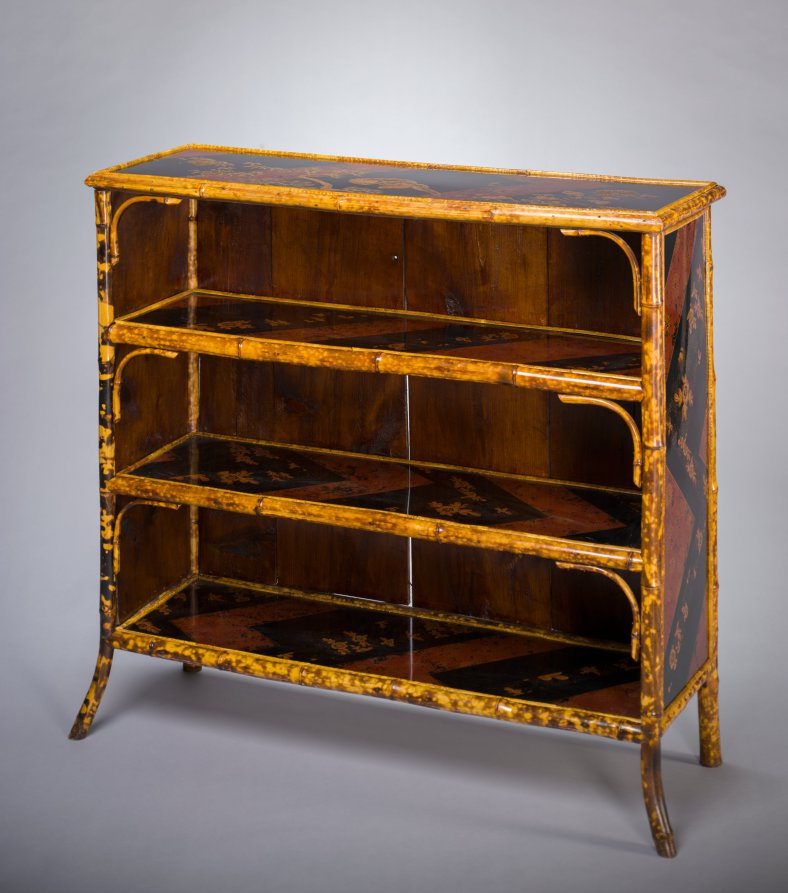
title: Bookcase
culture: France, 19th century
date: c. 1870–80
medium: bamboo with Japanese lacquer panels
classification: Wood